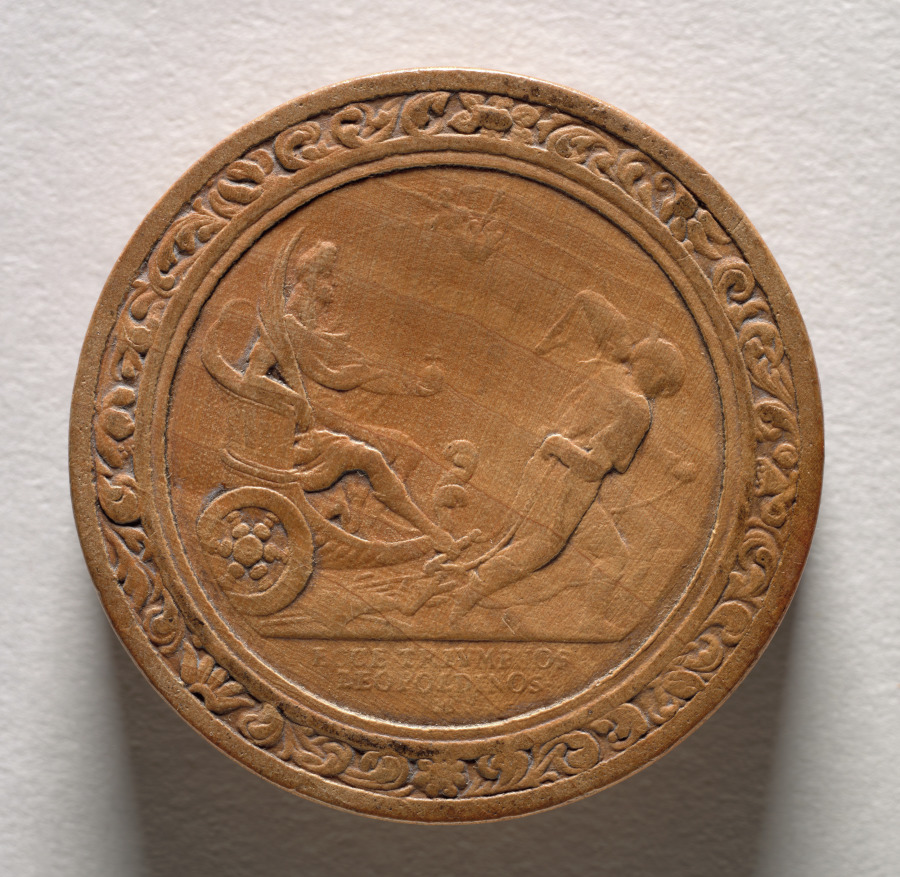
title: Gaming Piece (reverse)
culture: Germany, late 17th-early 18th Century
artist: Martin Brunner (German, 1659–1725)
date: c.1700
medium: wood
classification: Furniture and woodwork